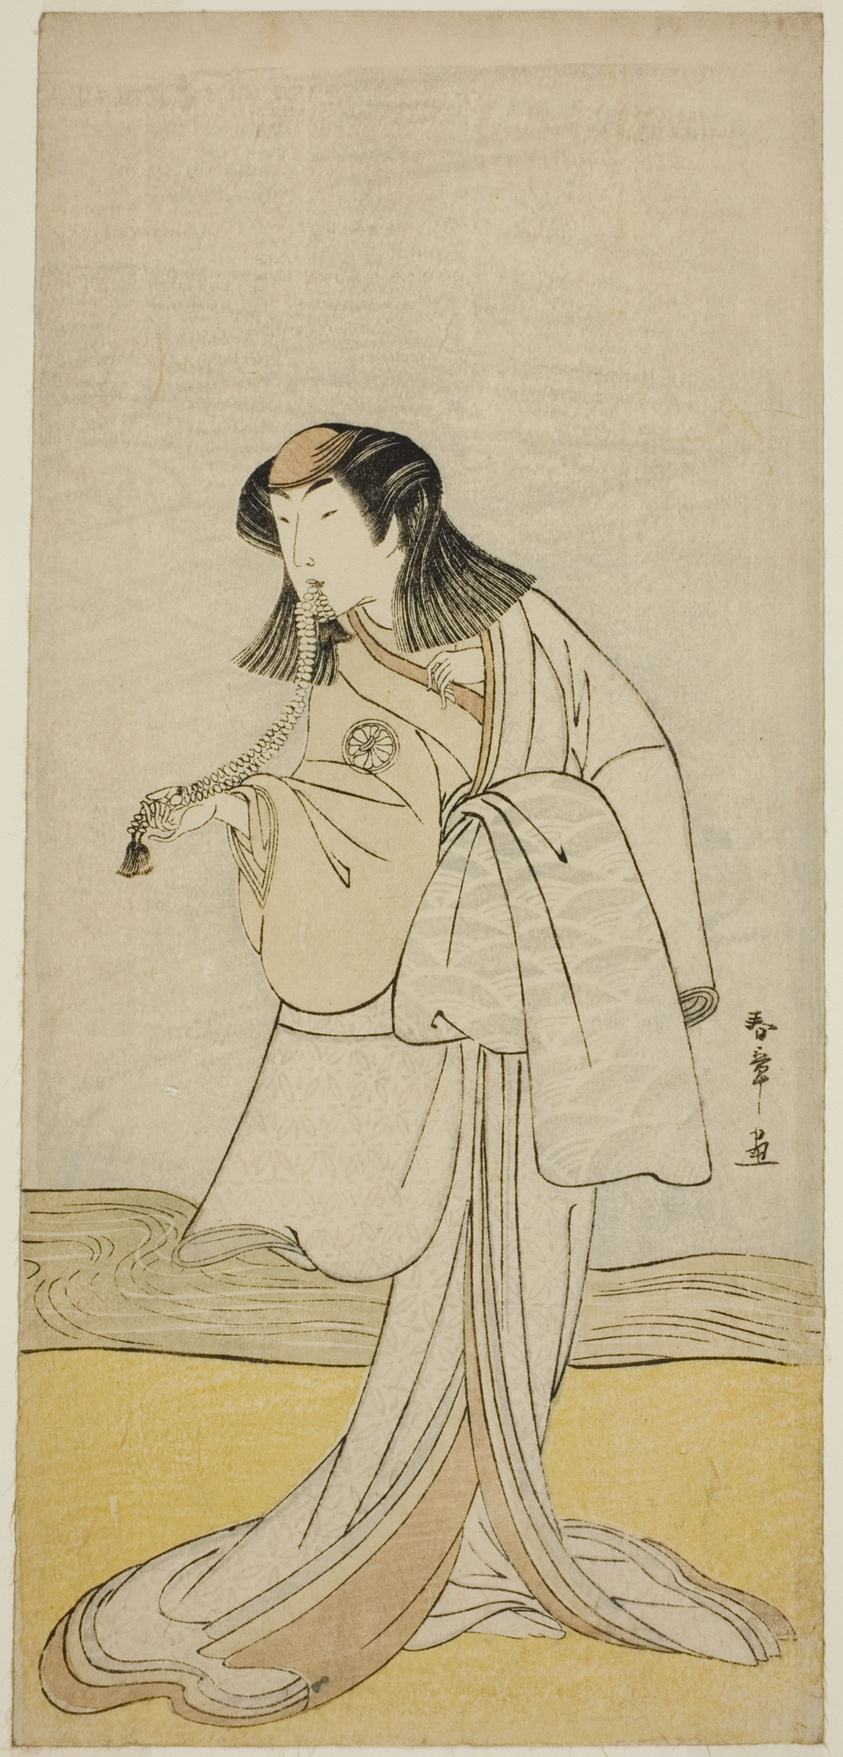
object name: Print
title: The Actor Segawa Kikunojo III as Miura no Katagai Disuigsed as the Nun Narukami, in the Play Ume-goyomi Akebono Soga, Performed at the Ichimura Theater in the Second Month, 1780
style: Japanese (culture or style)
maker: Katsukawa Shunsho 勝川 春章; Japanese, 1726-1792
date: c. 1780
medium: Color woodblock print; hosoban; center sheet of triptych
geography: Japan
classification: woodblock print; print; asian art